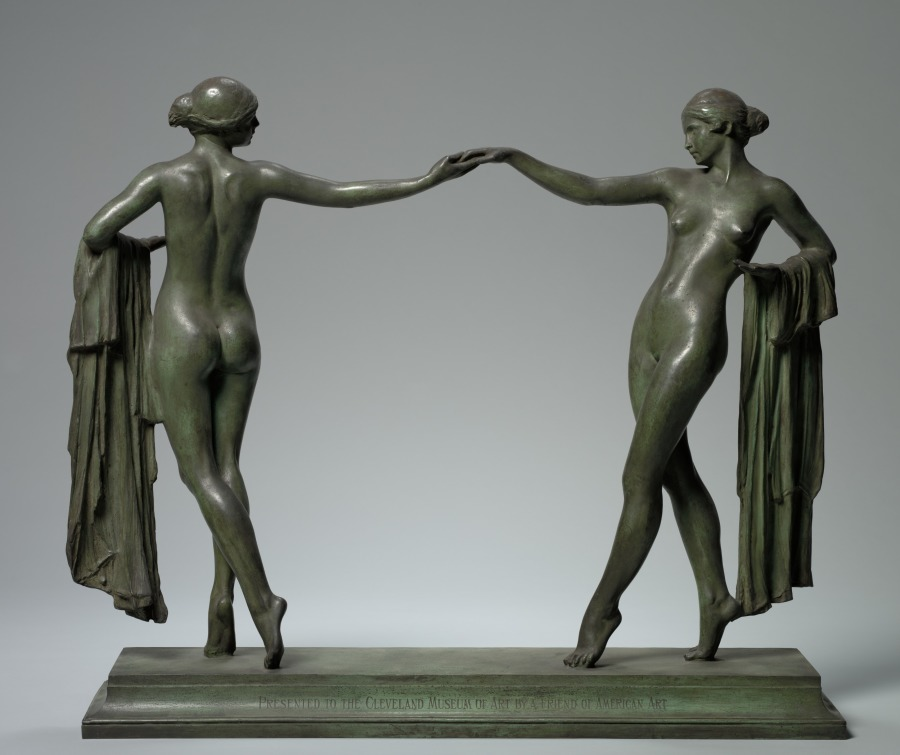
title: Andante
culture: America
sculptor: Mario Korbel (American, born Bohemia [now Czech Republic], 1882–1954)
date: 1917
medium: bronze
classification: Sculpture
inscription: signed on base: MARIO KORBEL 1917 ©